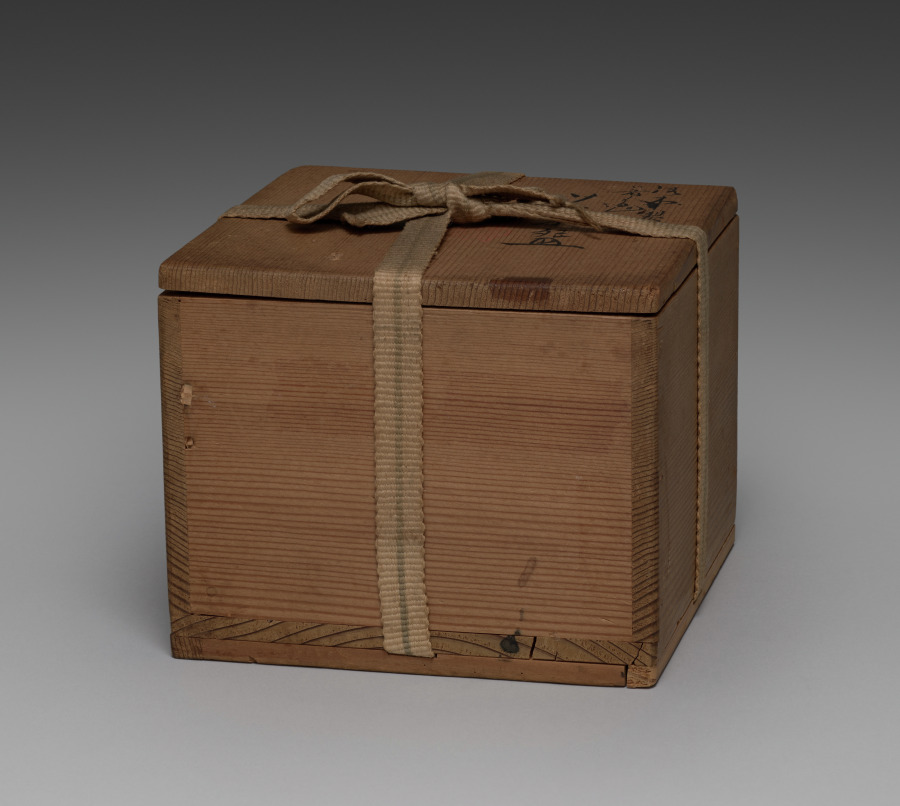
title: Teabowl with Pinks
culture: Japan, Meiji period (1868–1912)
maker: Seifū Yohei III (Japanese, 1851–1914)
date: 1893–1914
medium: Stoneware with crackled glaze and overglaze color enamel and gold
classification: Ceramic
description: This teabowl, for use in chanoyu, is a good example of Yohei III’s mastery of the techniques involved in producing Kyoto ware. The painting of the pinks, with their blue centers, bright red petals, and green leaves, is carefully controlled with crisp gold borders throughout. There is crackling in the transparent glaze and obvious, thick dripping of the milky glaze over the outside of the mouth of the bowl. The pink spots would have appeared in the clay during firing, and the bottom of the inside of the bowl is entirely pink. A triangular wedge has been cut away from the foot, and a gently impressed band rings the bowl beneath the rim.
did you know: The vessel comes with a bespoke brocade pouch with a silk fastening cord, as is customary for Japanese teabowls.